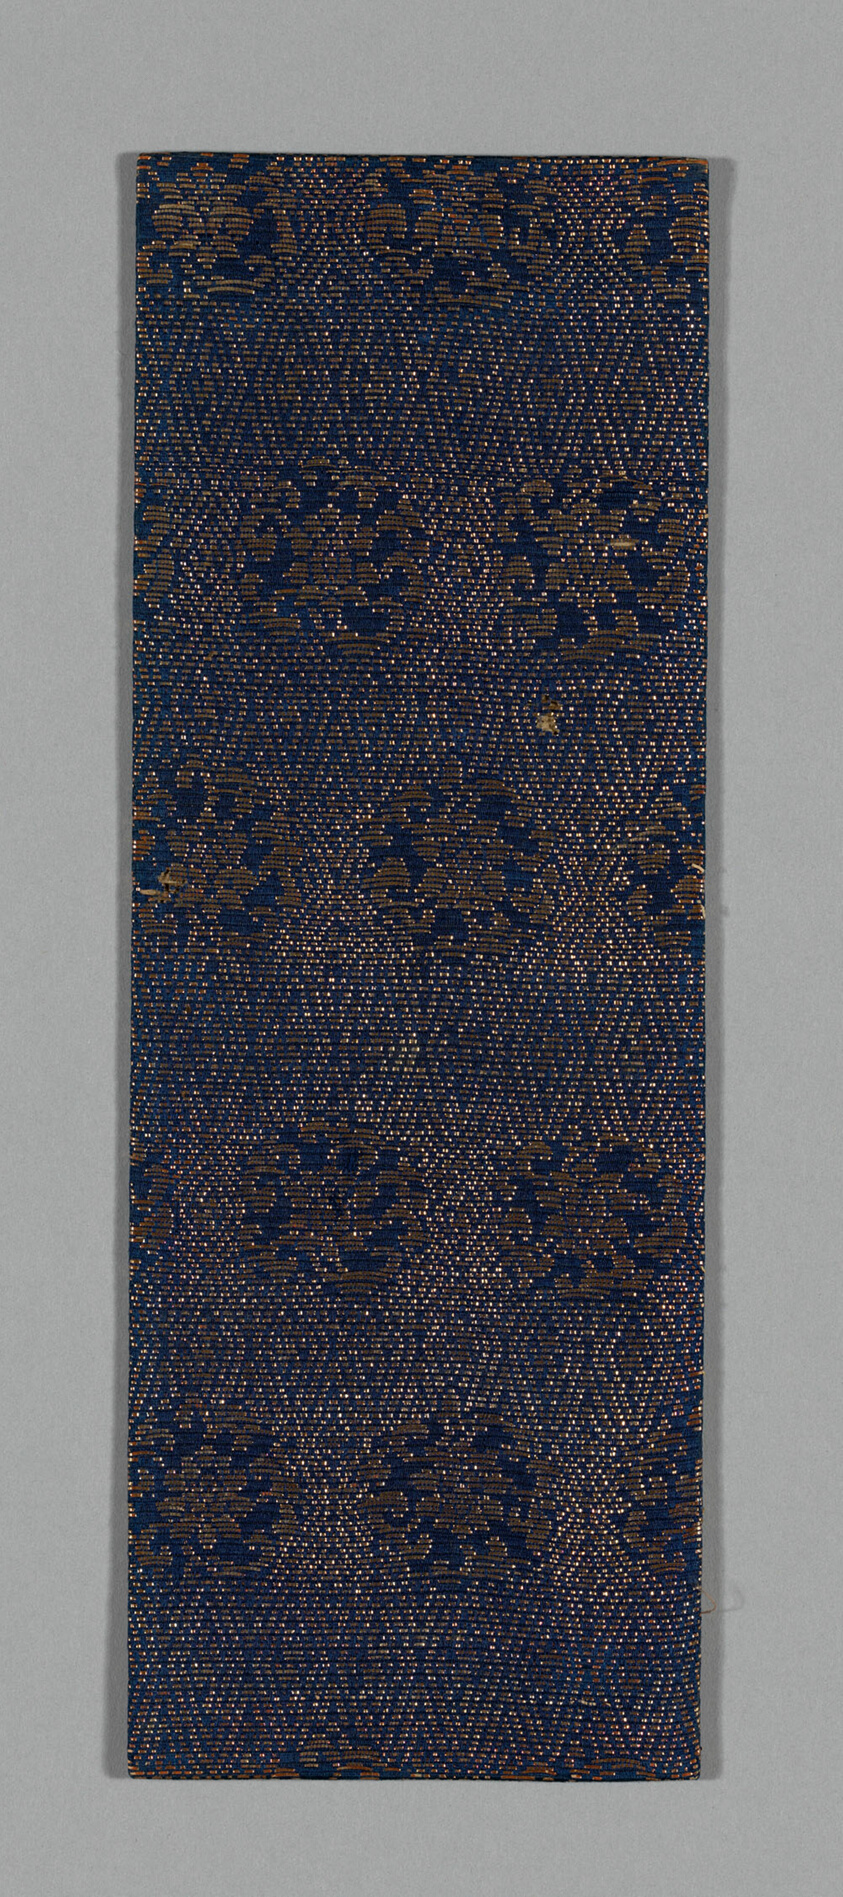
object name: Textile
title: Sutra Cover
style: ming, Chinese (culture or style), East Asian, asian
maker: China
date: Ming dynasty (1368–1644), c. 1590's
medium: Silk and gold-leaf-over-lacquered-paper strip, warp-float faced 3:1 broken twill weave with supplementary patterning wefts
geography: China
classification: textile; weaving